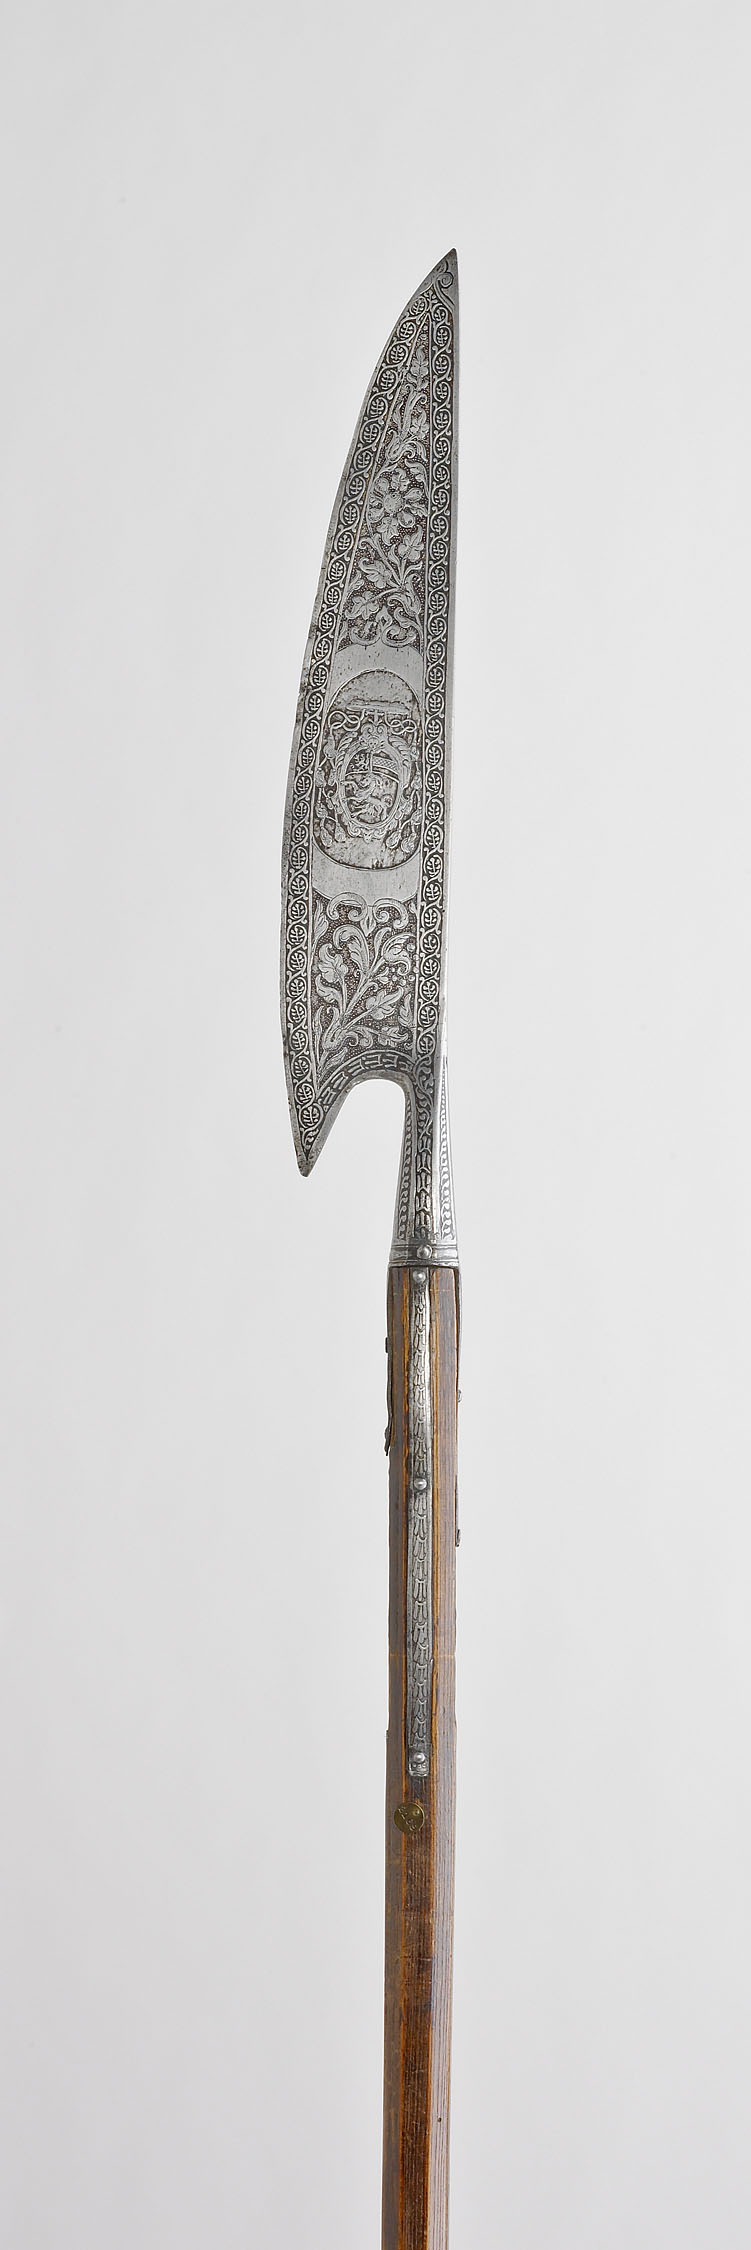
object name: Arms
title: Glaive for the Bodyguard of Markus Sittikus von Hohenems, Prince-Archbishop of Salzburg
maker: Austrian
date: 1589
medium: Steel and oak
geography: Austria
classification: edged weapon-staff; arms; arms and armor